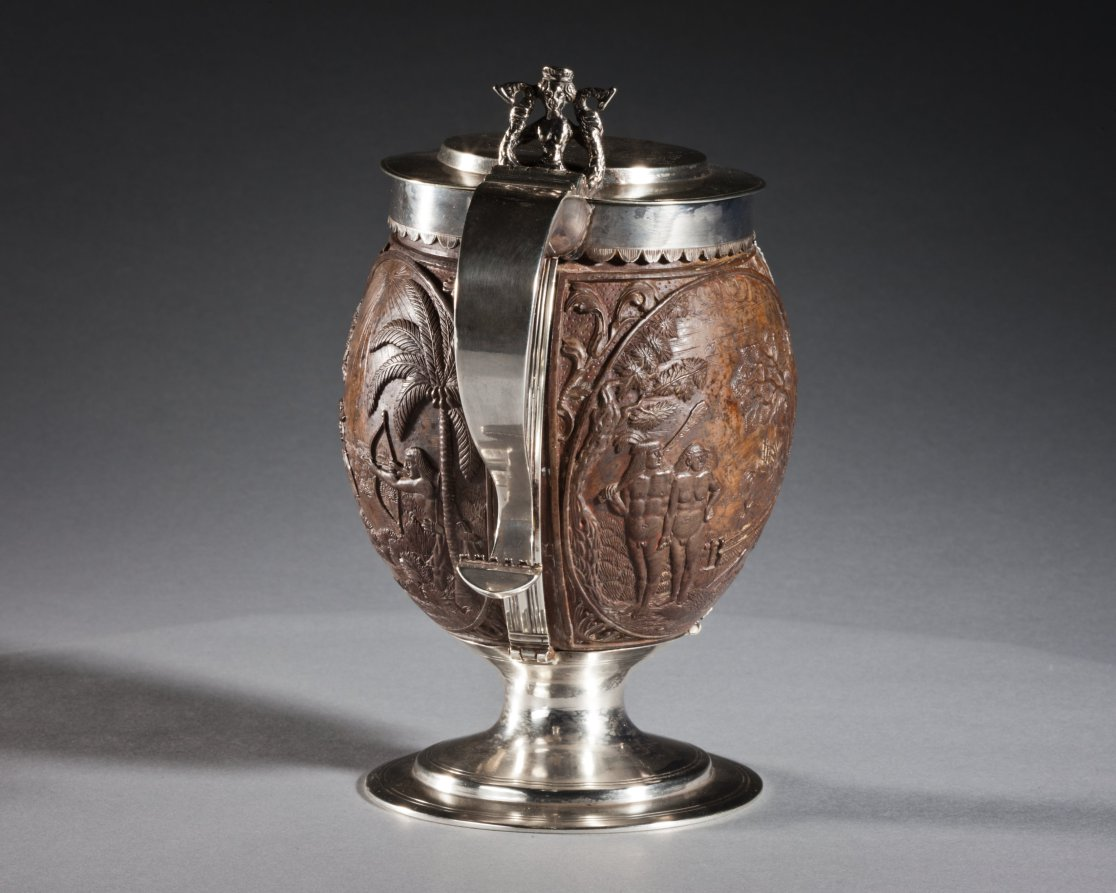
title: Coconut Cup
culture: carved coconut, probably The Netherlands; silver mount, probably England, 17th century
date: c. 1630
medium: carved coconut in silver mount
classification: Metalwork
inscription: top lid has engraved coat-of-arms, underside of lid has inscription: George Lewis TIVERTON Feby, 1st 1760.